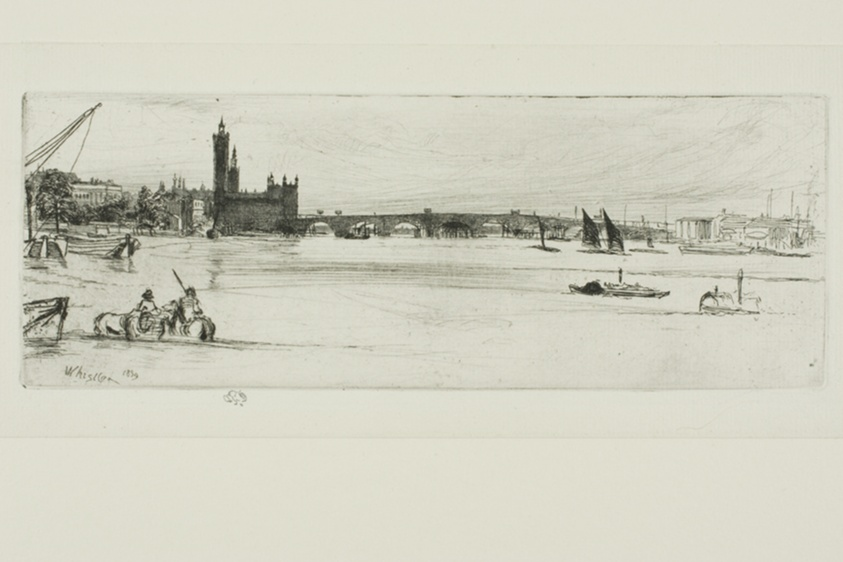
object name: Print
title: Old Westminster Bridge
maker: James McNeill Whistler (American, 1834-1903)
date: 1859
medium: Etching and drypoint in black ink on ivory laid paper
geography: United States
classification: etching; print; prints and drawing; paper; drypoint